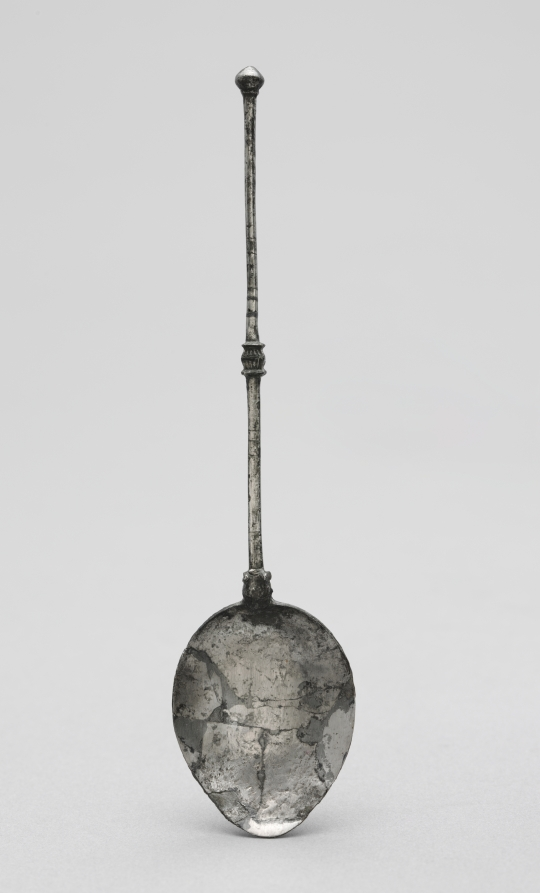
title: Spoon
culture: Byzantium, Syria(?), Byzantine period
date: 300s CE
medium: silver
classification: Metalwork